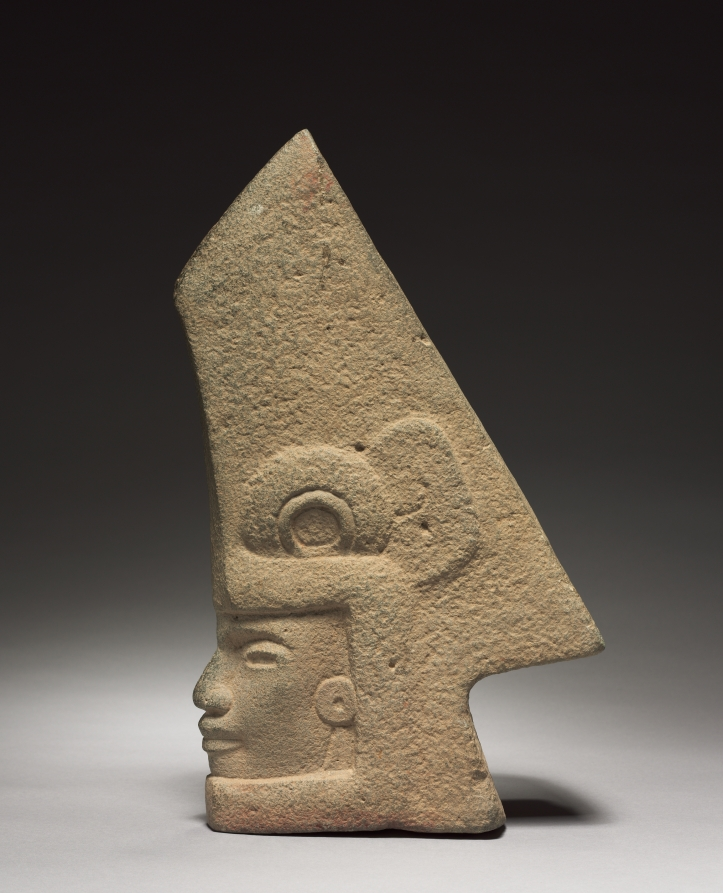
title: Hacha with Human Face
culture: Mexico, Veracruz, San Andres Tuxtla, late Classic period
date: 600–1000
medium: gray volcanic stone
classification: Sculpture